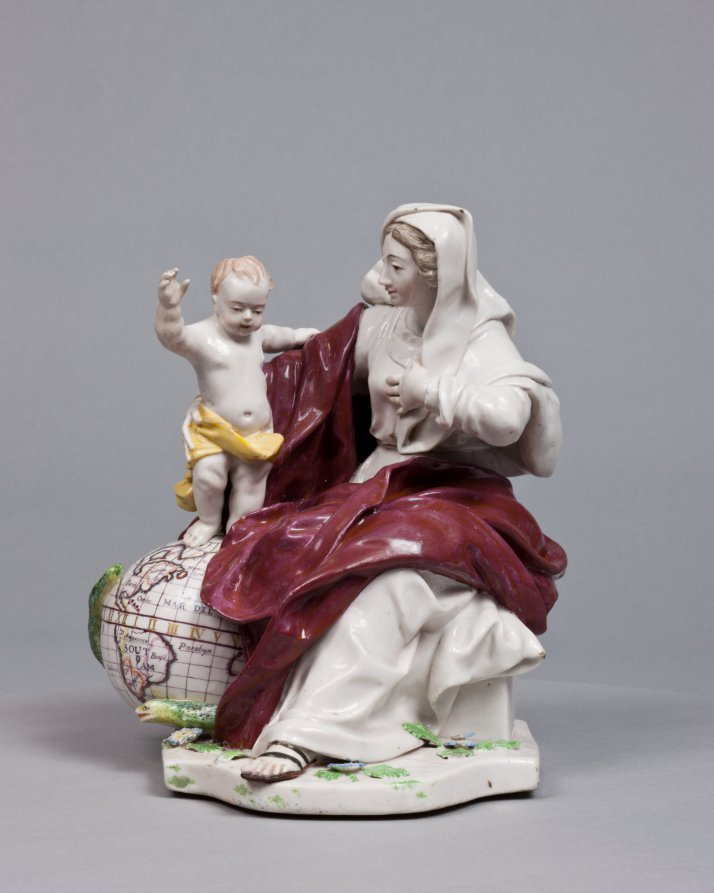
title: Madonna and Child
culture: England, Chelsea, 18th century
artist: Chelsea Porcelain Factory (Britain, London, 1745–84)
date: c. 1755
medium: porcelain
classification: Ceramic